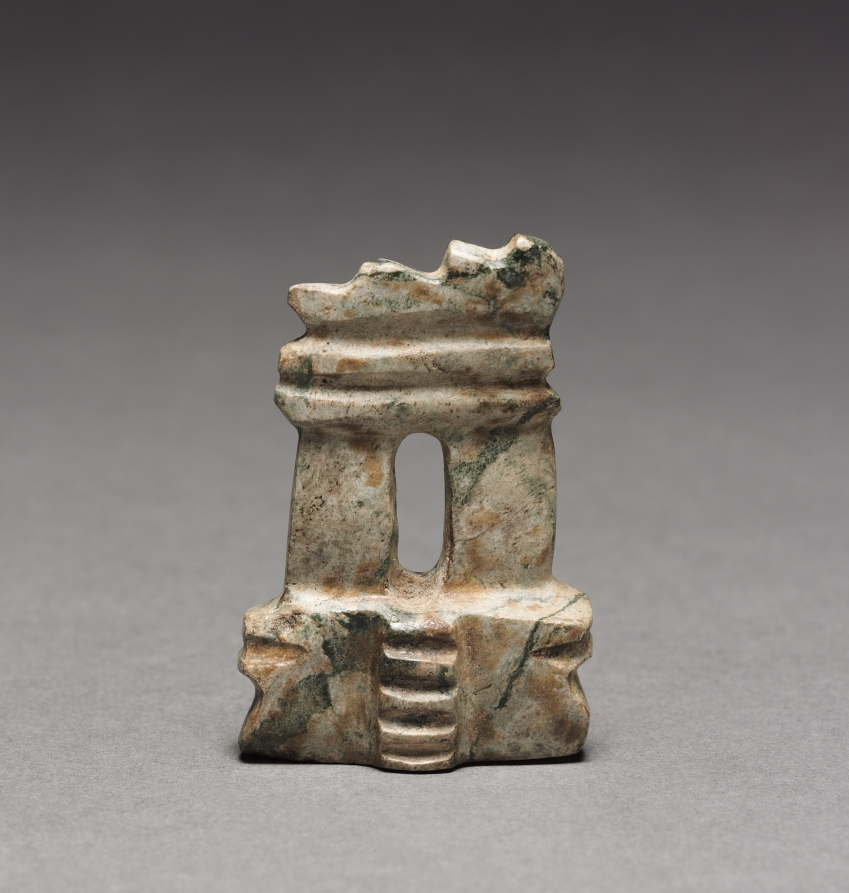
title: Architectural Model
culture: Mesoamerica, Mexico, Guerrero, Mezcala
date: 100 BCE–300 CE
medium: serpentine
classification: Sculpture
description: The Mezcala style takes its name from a river in its homeland, the Guerrero region of western Mexico. The style is known for small-scale stone sculptures including architectural “models” characterized by sleek abstraction. Because comparisons to actual architecture in the Mezcala region are scarce, it is not known whether the models refer to temples, houses, or underground funerary structures.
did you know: Estimated dates for Mezcala sculpture have ranged from 2000 BC to as late as 1454–1521.